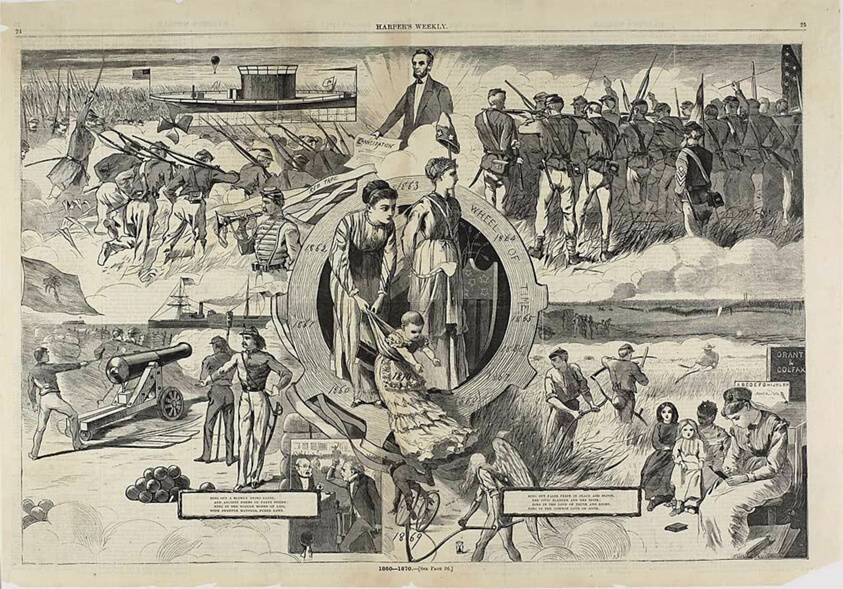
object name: Print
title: 1860-1870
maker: Winslow Homer (American, 1836-1910); published by Harper's Weekly (American, 1857-1916)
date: published January 8, 1870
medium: Wood engraving on paper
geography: United States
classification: wood engraving; print; prints and drawing